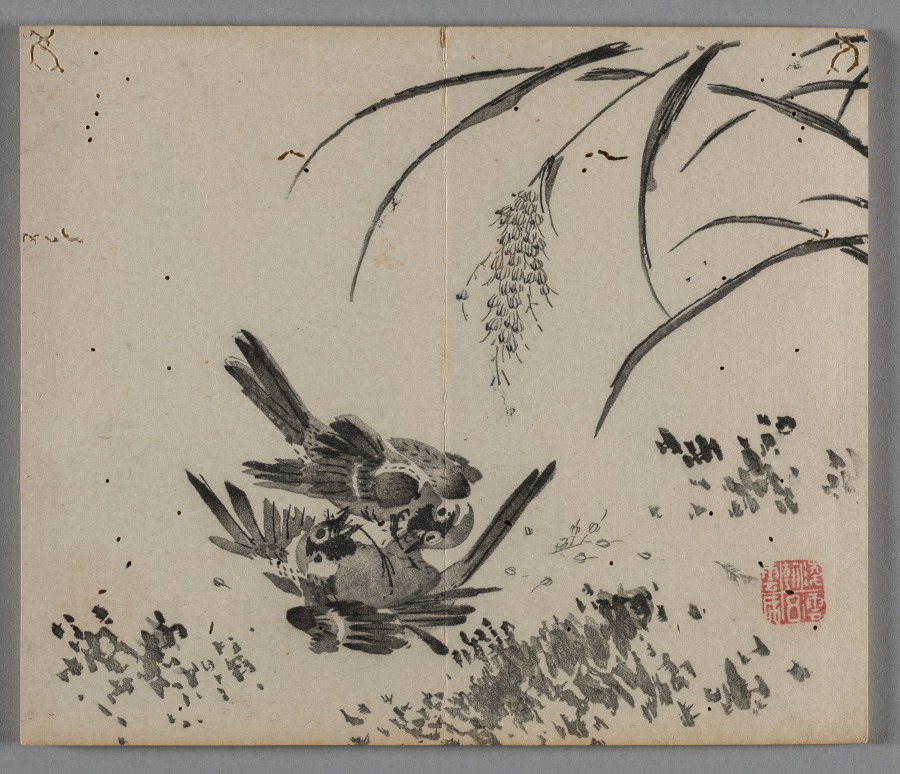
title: Ten Bamboo Studio Painting and Calligraphy Handbook (Shizhuzhai shuhua pu): Birds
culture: China, Qing dynasty (1644-1911)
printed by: Hu Zhengyan (Chinese, c. 1584–1674)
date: 1633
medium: Woodblock-printed book; ink and colors on paper; first edition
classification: Print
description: Color printing reached a level of perfection in the early 1600s, as seen in this Ten Bamboo Studio Collection of Calligraphy and Painting and the Mustard Seed Garden Manual of Painting (printed 1679 and 1701). The painterly quality, precision in registering (aligning) the woodblocks, and harmonious colors made them the most successful color print editions in Chinese history. Both editions were printed and compiled in Nanjing, spread nationwide, and had a great impact on the arts in Japan and Korea.